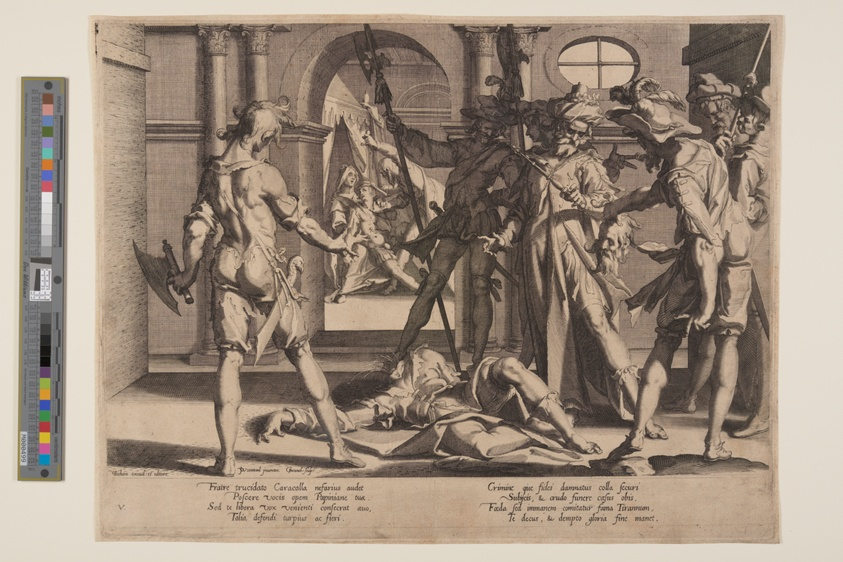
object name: Print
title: Beheading of the Roman Judge Papinian, plate 5 from Thrones of Justice (Thronus Iustitiae)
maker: Willem van Swanenburgh (Dutch, 1580–1612); after Joachim Wtewael (Dutch, 1566–1638)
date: 1606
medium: Engraving on ivory laid paper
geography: Netherlands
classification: print; paper; prints and drawing; engraving